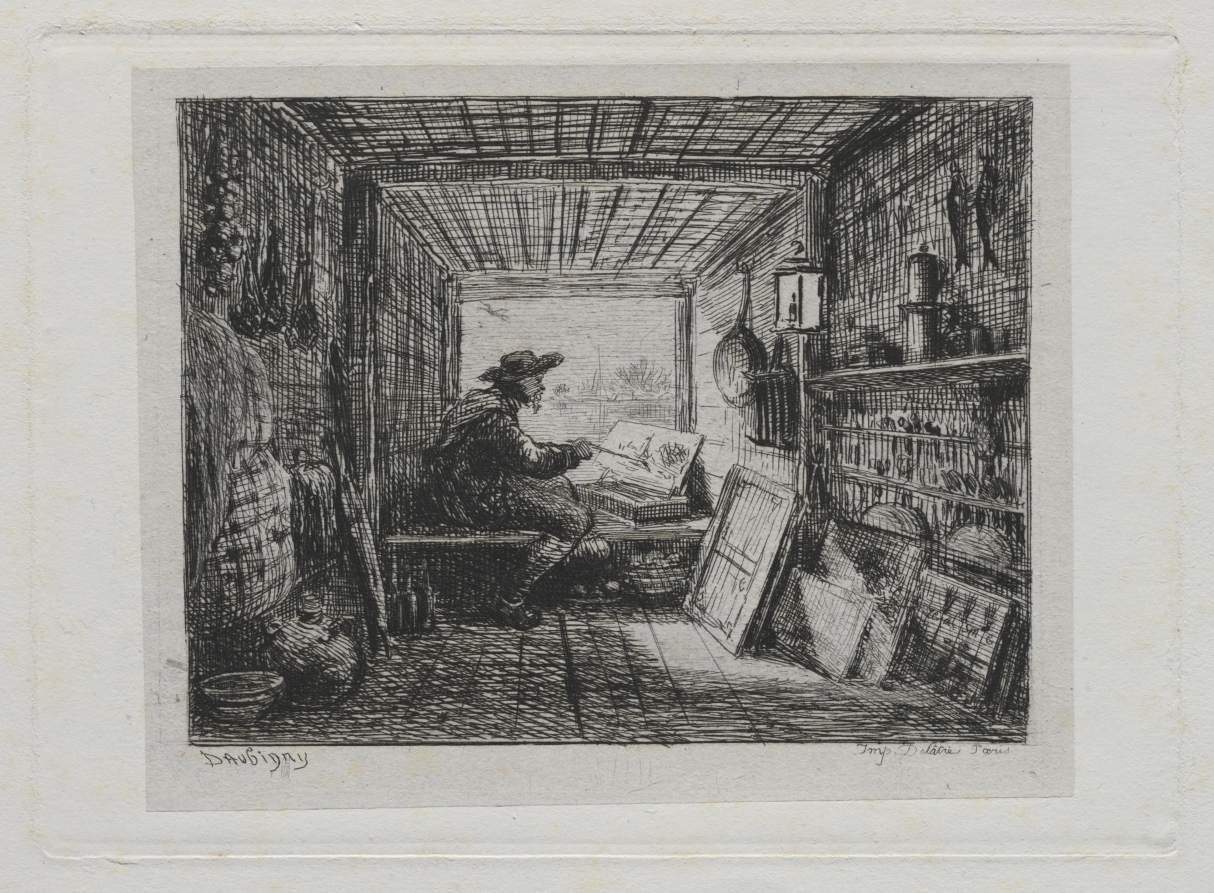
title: The Boat Trip: The Studio on the Boat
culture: France, 19th century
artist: Charles François Daubigny (French, 1817–1878)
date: 1861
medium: etching with chine collé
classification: Portfolio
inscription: lower left corner, in graphite: L. D. 111